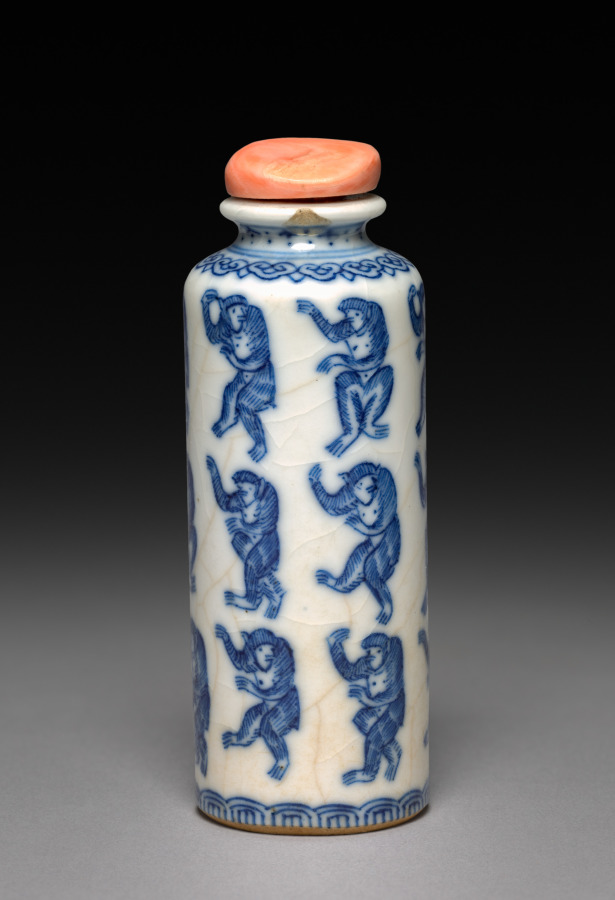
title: Snuff Bottle with Stopper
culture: China, Jiangxi Province, Jingdezhen kilns, Qing dynasty (1644–1911), Yongzheng mark and reign (1723–35)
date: 1723–35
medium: porcelain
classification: Ceramic